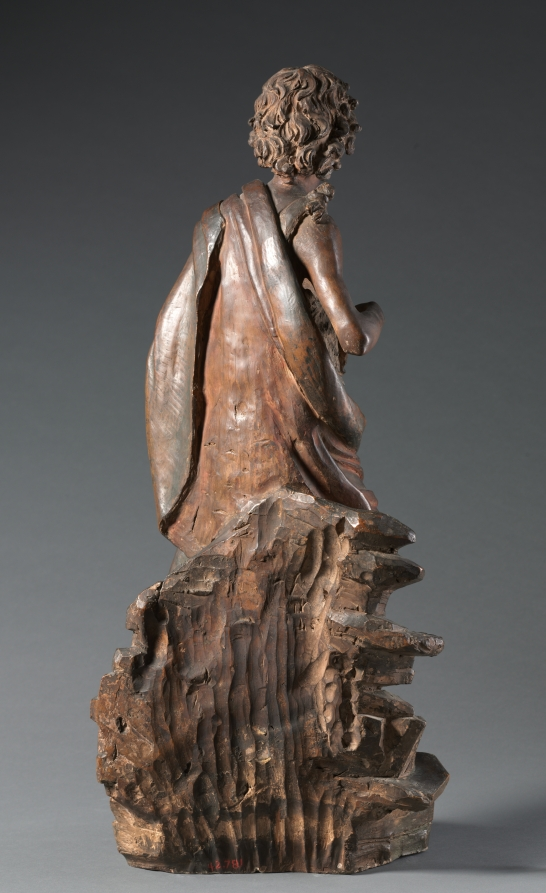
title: Saint John the Baptist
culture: Italy, Florence, 16th century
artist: Master of the Saint John Statuettes (Italian)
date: c. 1500–1525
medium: terracotta with traces of polychromy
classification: Sculpture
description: This statuette belongs to a group of terracotta sculptures representing David (from the OldTestament) and Saint John (from the New Testament) produced by a still unidentified Florentine artist and his studio in the late 1400s and early 1500s. Giventheir scale, it seems likely that these sculptures were intended for use in private homes rather than churches.